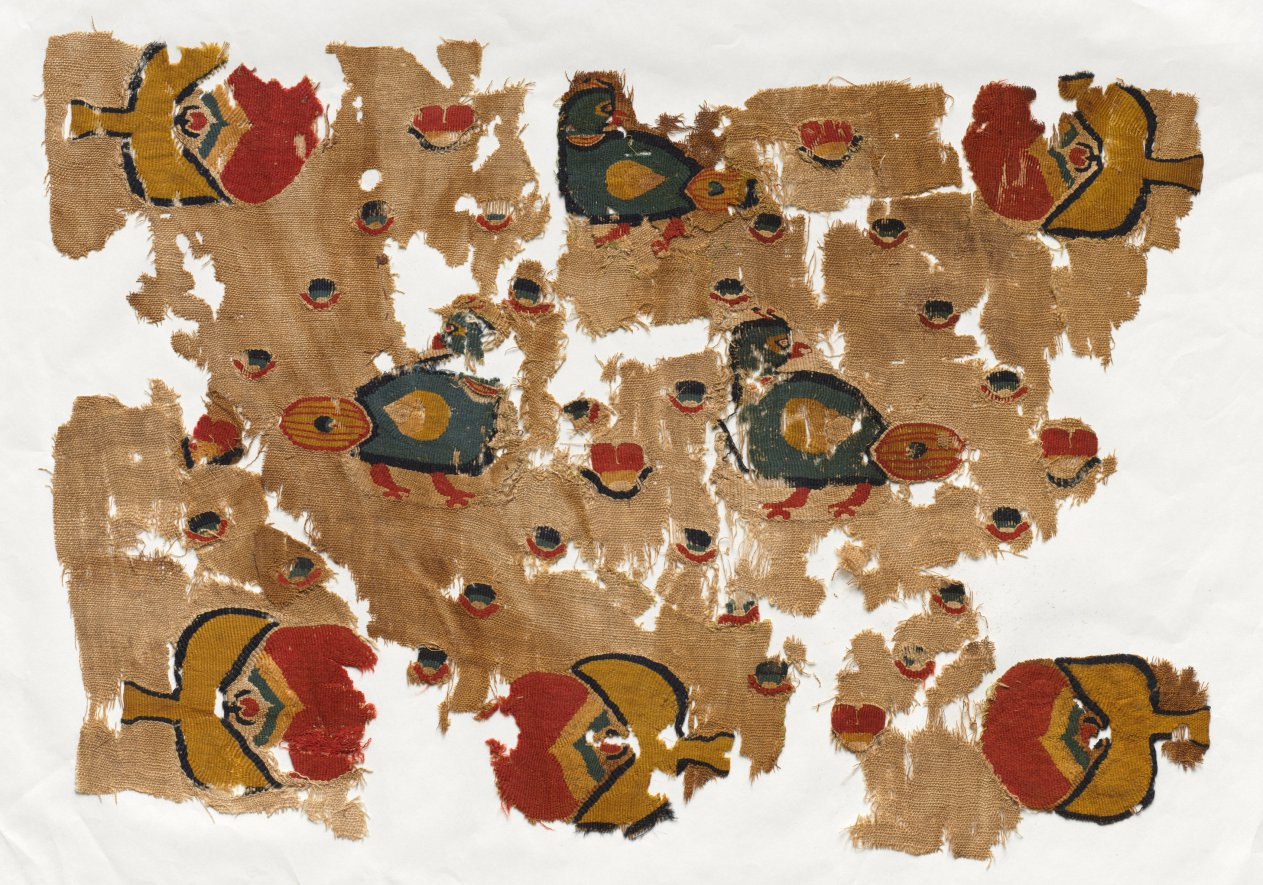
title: Fragment of a Curtain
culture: Egypt, Byzantine period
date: 500s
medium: tabby weave, inwoven tapestry ornament; wool and linen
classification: Textile